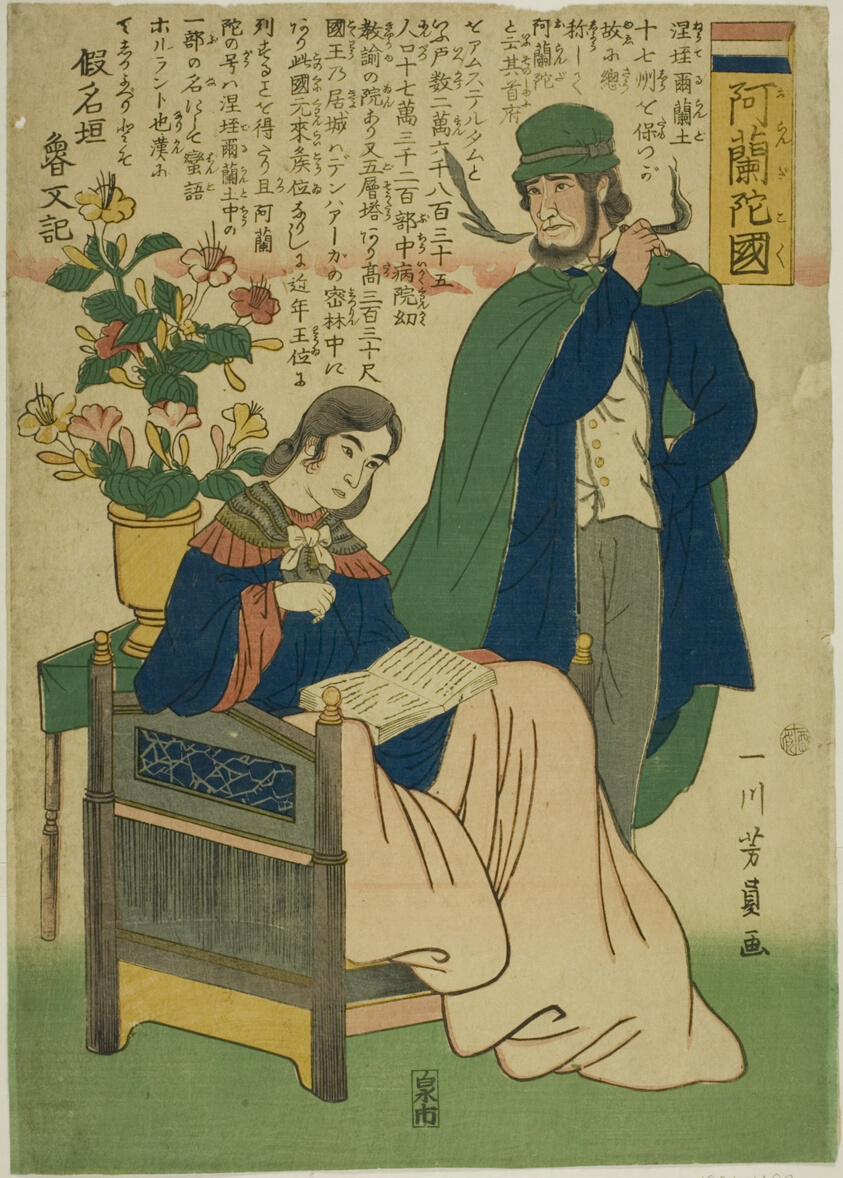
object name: Print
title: Holland (Oranda koku)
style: Japanese (culture or style)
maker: Utagawa Yoshikazu (Japanese, active c. 1850-70)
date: 1861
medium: Color woodblock print; oban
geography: Japan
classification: woodblock print; print; asian art